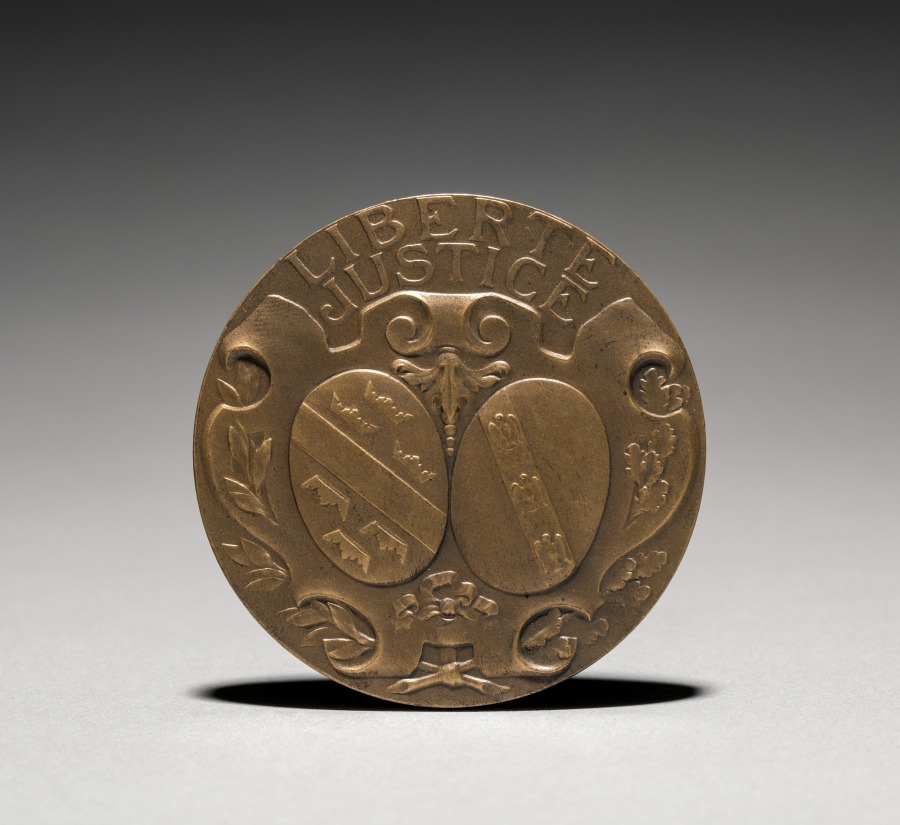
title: Medallion (reverse)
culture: France, 19th-20th century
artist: Charles-Theodore Perron (French, 1862–1934)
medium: bronze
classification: Metalwork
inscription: "LIBERTE"/"JUSTICE."